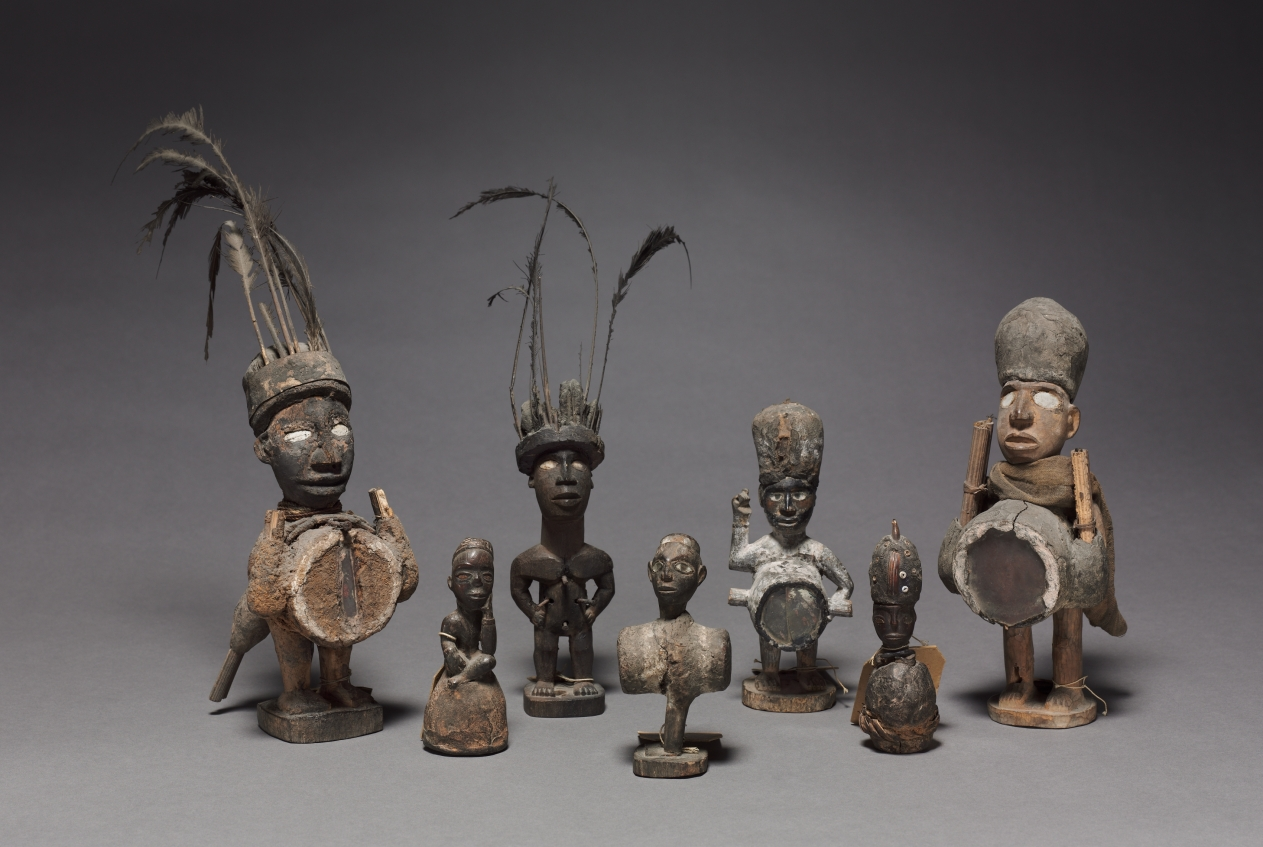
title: Power figure (nkisi)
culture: Central Africa, Republic of the Congo, Kongo people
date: late 1800s-early 1900s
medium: Wood, organic materials (including resin), iron, reed, tooth, seashell or glass beads, and possibly plastic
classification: Sculpture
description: One of seven anthropomorphic figurines, these minkisi contained medicines in which an ancestral spirit was believed to reside. Minkisi were objects of communal use; if conflict arose between two citizens, the Nkisi figure, along with the nganga (ritual leader) helped resolve the dispute. This small figure belonged to “the sorcerer of Loango,” chief of all sorcerers of that region (a province and port in West Central Africa).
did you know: This small figure belonged to “the sorcerer of Loango,” chief of all sorcerers of that region (a province and port in West Central Africa).